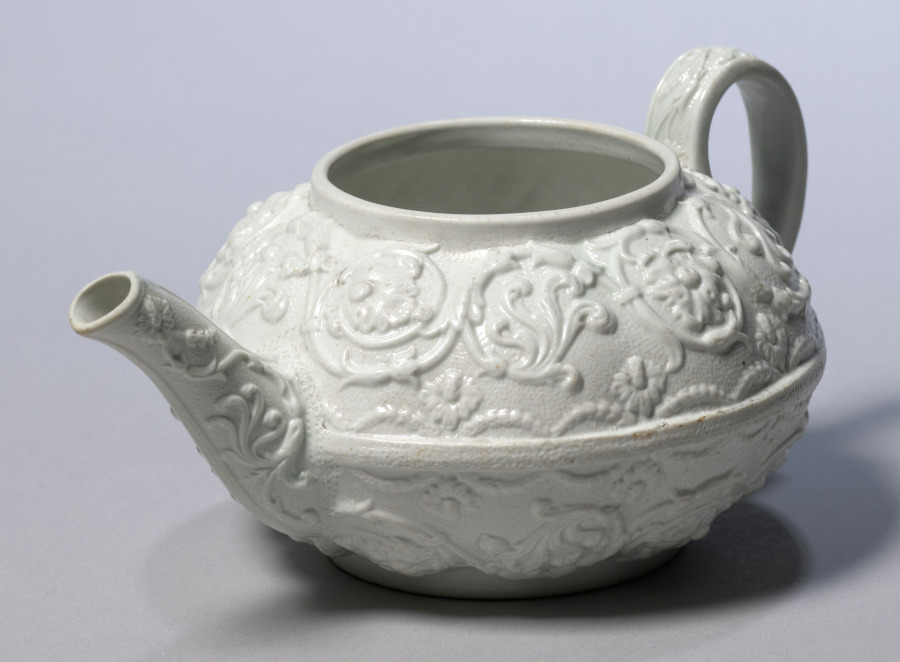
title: Teapot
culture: England, Staffordshire, 19th century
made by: Wedgwood Factory (British)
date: c. 1830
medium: stoneware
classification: Ceramic